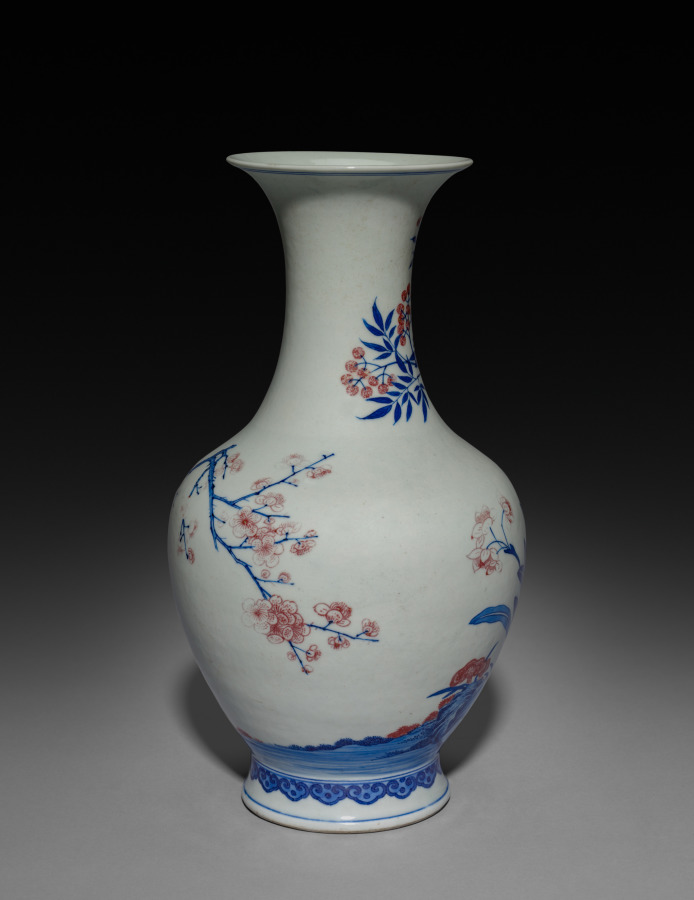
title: Vase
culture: China, Jiangxi province, Jingdezhen kilns, Qing dynasty (1644-1911), Yongzheng reign (1723-35)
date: 1723–35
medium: porcelain with underglaze blue and red decoration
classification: Ceramic